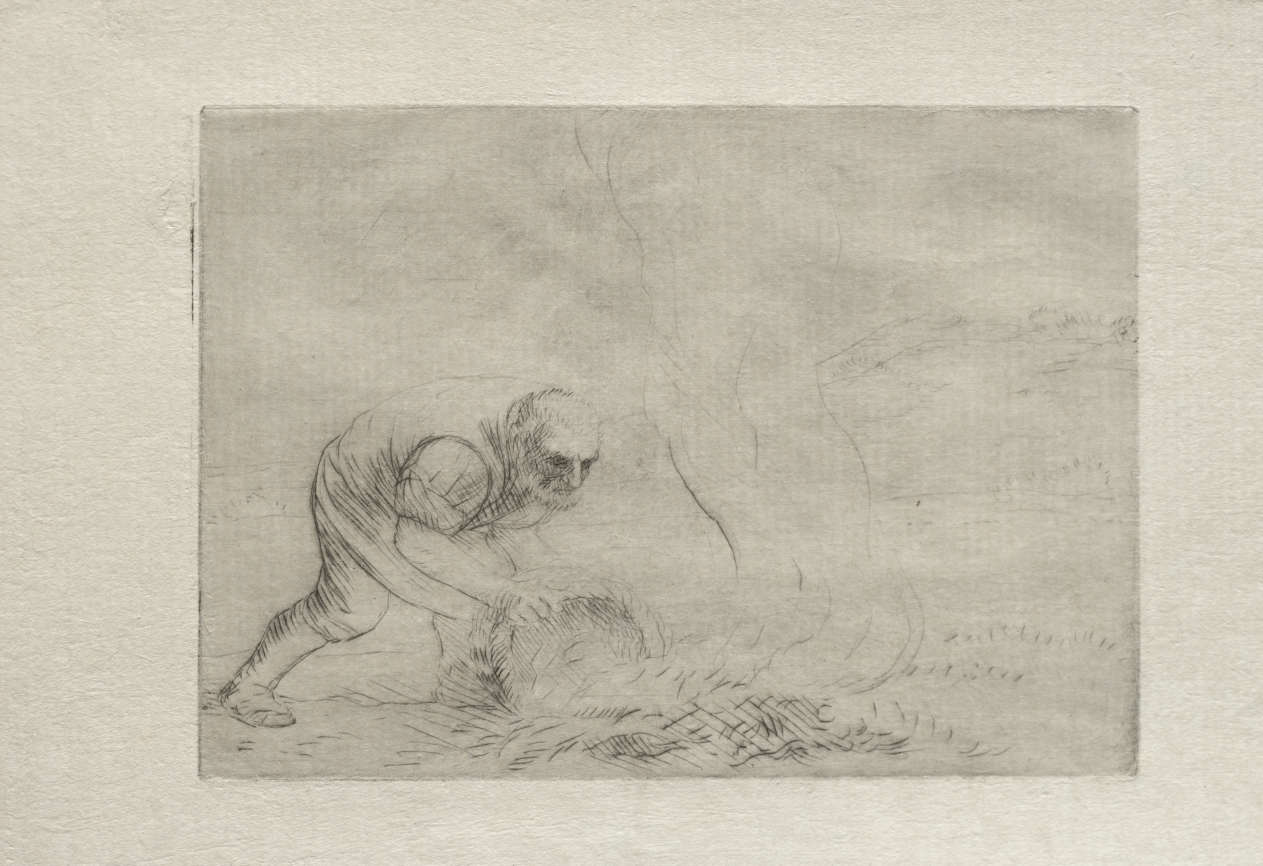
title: Burning the Grass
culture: France, 19th-20th century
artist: Alphonse Legros (French, 1837–1911)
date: c. 1857–1911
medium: etching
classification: Print